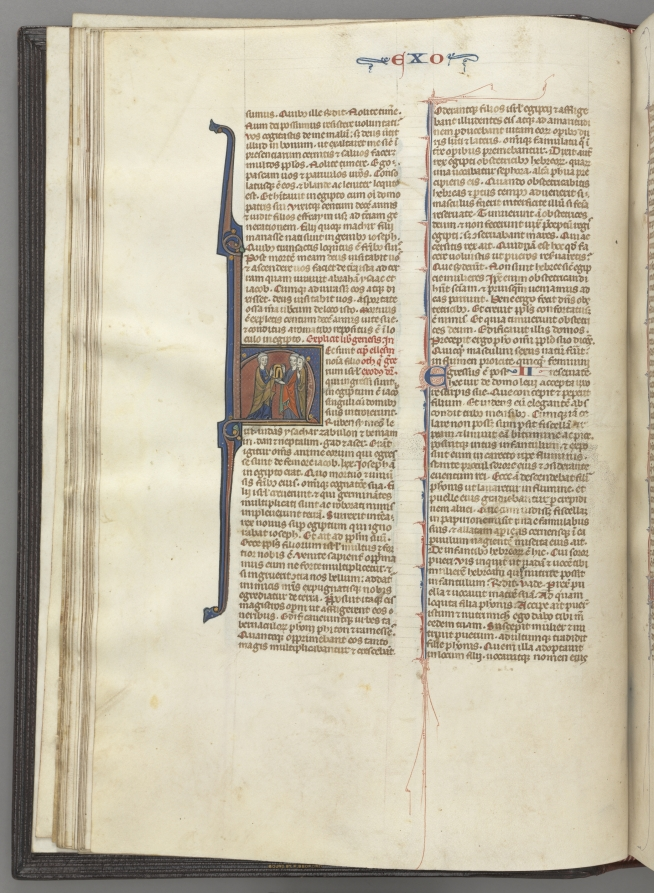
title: Fol. 20v, Exodus, historiated initial H, Moses and two followers with the tablets of the law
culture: Southern France, Toulouse(?), 13th century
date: c. 1275–1300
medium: ink, tempera and gold on vellum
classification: Bound Volume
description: Biblical manuscripts were highly prized and important possessions of churches, monasteries, cathedral schools, and universities throughout medieval Europe. The biblical texts were known as the vulgate, the translations made by Saint Jerome in the fourth century from Hebrew and Greek into Latin, which became the definitive and official Latin version of the Roman Church. In the 13th century, the bible was, for the first time, produced as a single volume with an officially sanctioned sequence to its books and chapters as illustrated by this example. The very extensive decoration of this bible is arranged hierarchically to indicate the relative importance of the various texts so that full or almost full-page initials mark the openings of the first prologue, Genesis, and the first Gospel; historiated initials mark the beginning of each book and illuminated initials mark the Prologues.